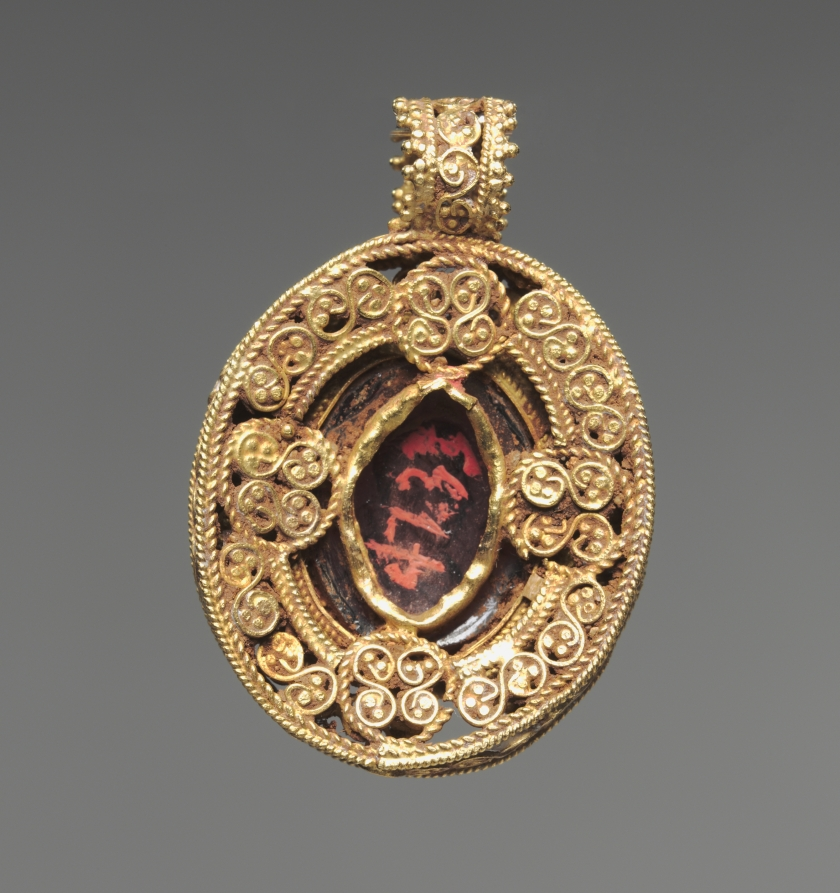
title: Pendant with Portrait Intaglio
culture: Byzantium, early Byzantine period, 6th century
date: 500s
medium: garnet with gold filigree setting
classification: Glyptic